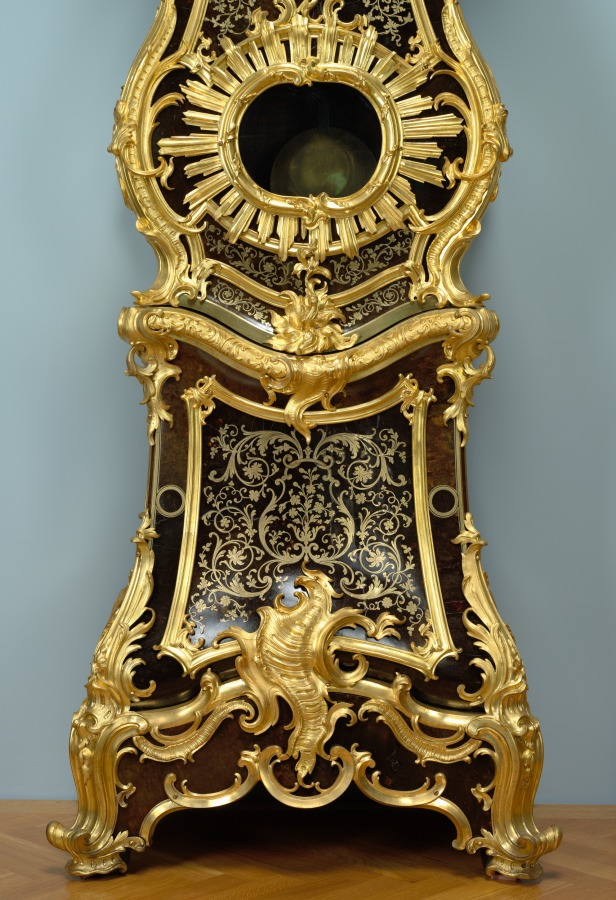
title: Tall- case Clock (Regulateur)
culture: France, Paris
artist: Jean-Pierre Latz (French, 1691–1754)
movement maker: Stollewerck (French)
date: 1744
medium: boulle marquetry with gilt bronze mounts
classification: Furniture and woodwork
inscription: incised on the back of the lowest front panel: .LATZ . A . PARISIIS . FECIT ./. MDCCXLIV; engraved on the clock face: Stollewerck/Paris.